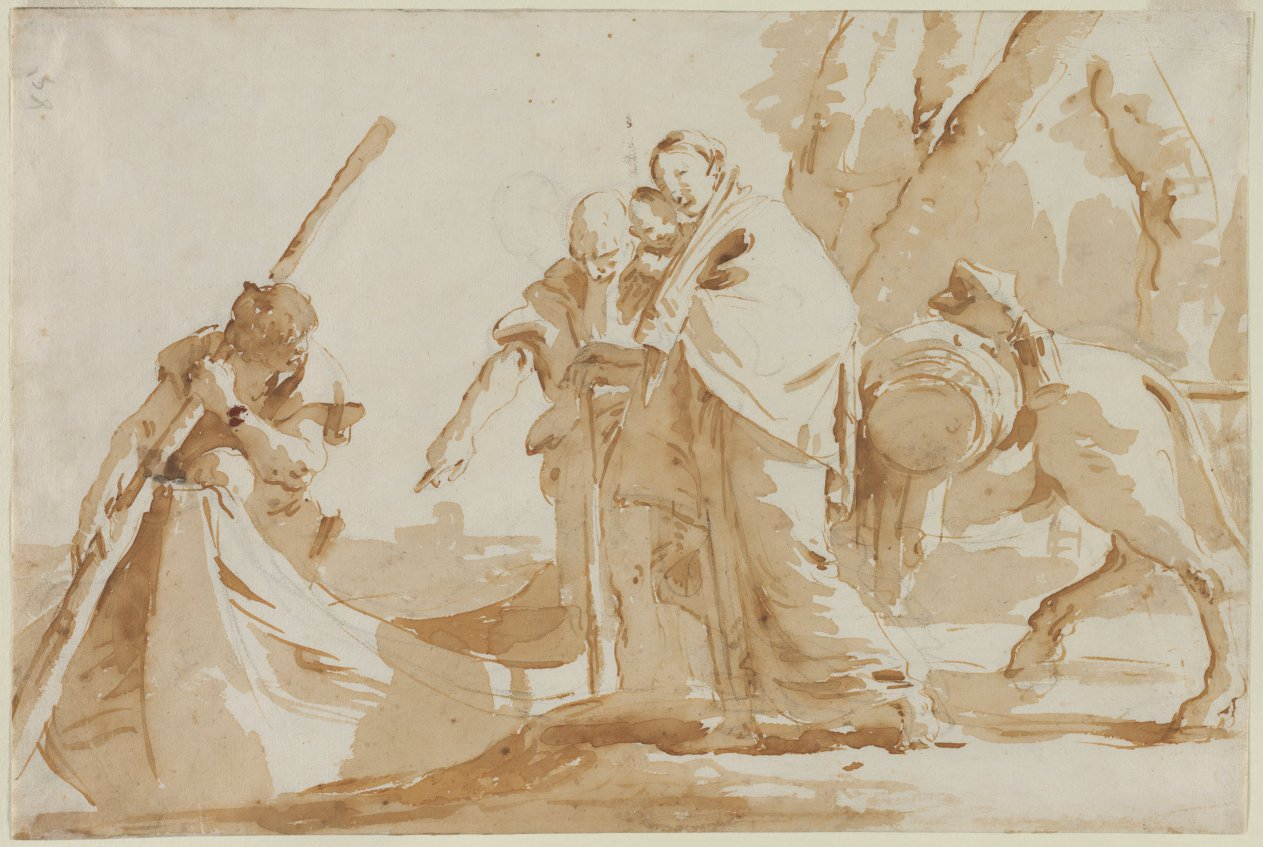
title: Flight into Egypt: The Embarkment of the Holy Family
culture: Italy, 18th century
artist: Giovanni Battista Tiepolo (Italian, 1696–1770)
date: c. 1735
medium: pen and brown ink and brush and brown wash over black chalk; framing lines in black chalk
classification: Drawing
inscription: upper left, in black chalk: [851?] [sideways]